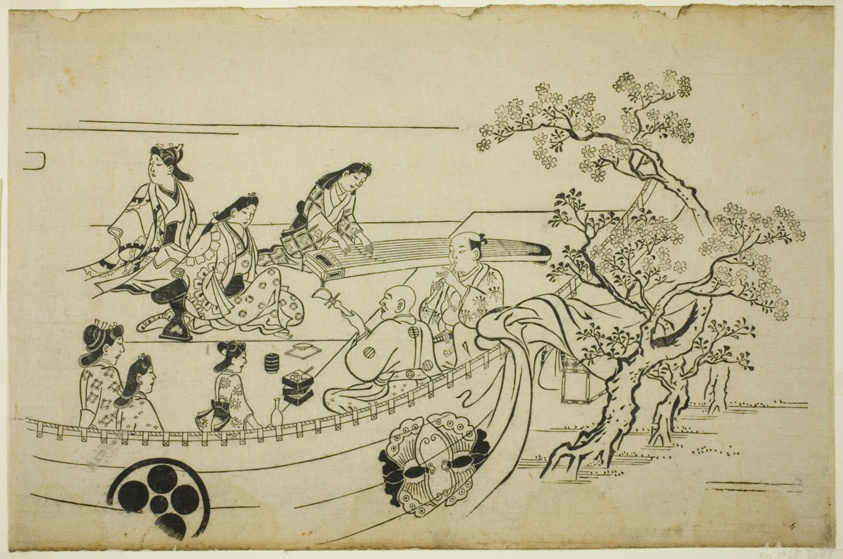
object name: Print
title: Flower-Viewing Party with Crest-Bearing Curtain, from the series "Flower Viewing at Ueno (Ueno hanami no tei)"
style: Japanese (culture or style)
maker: Hishikawa Moronobu (Japanese, (?)-1694)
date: c. 1681/84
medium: Woodblock print; oban, sumizuri-e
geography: Japan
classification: woodblock print; print; asian art; woodblock